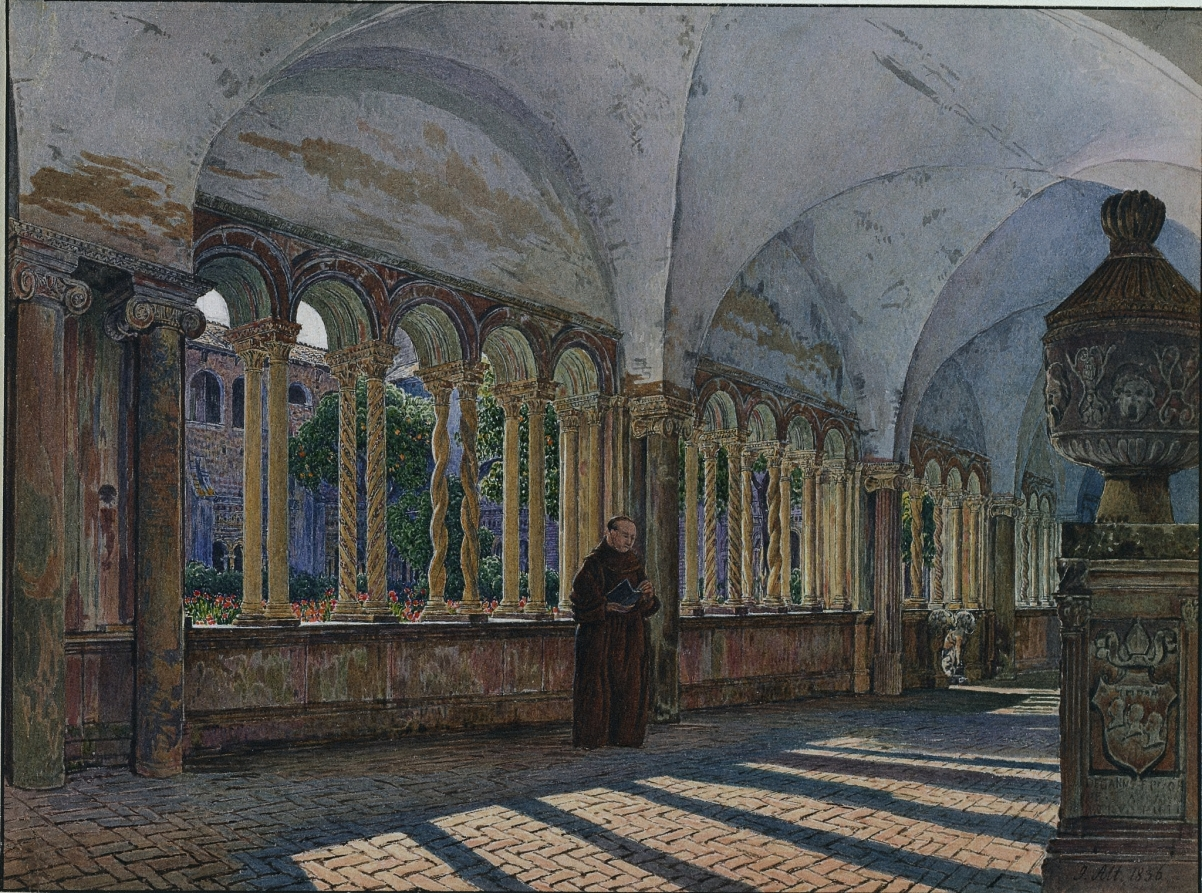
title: View of the Cloister of San Giovanni in Laterano, Rome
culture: Austria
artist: Jakob Alt (Austrian, 1789–1872)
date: 1836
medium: pen and black ink and watercolor over black chalk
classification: Drawing